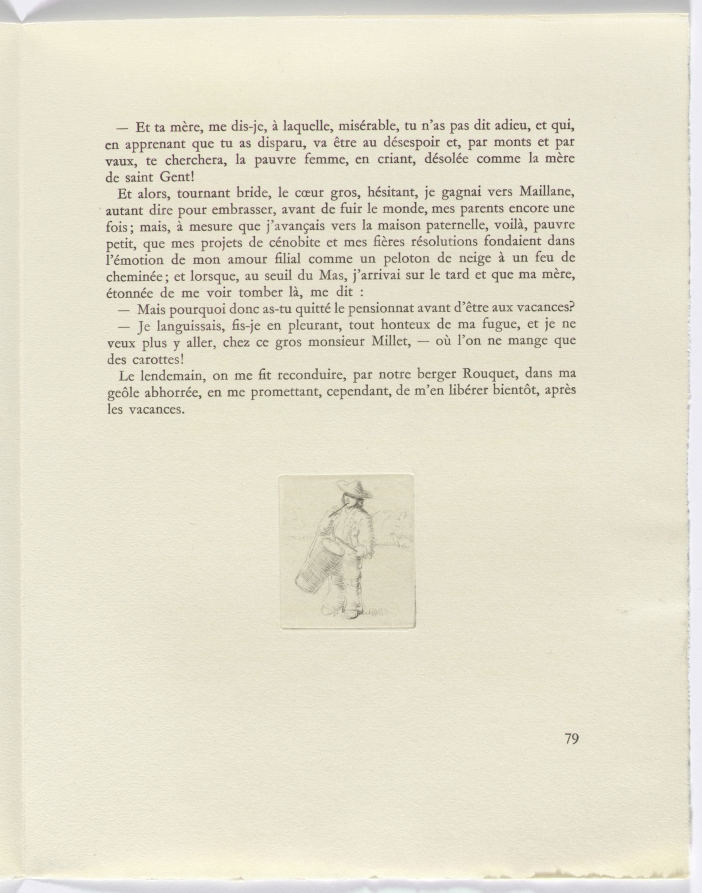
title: Frédéric Mistral: Mémoires et Recits by Frédéric Mistral: boy playing drum (page 79)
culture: France, 20th century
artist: Auguste Brouet (French, 1872–1941)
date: 1937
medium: etchings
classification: Portfolio